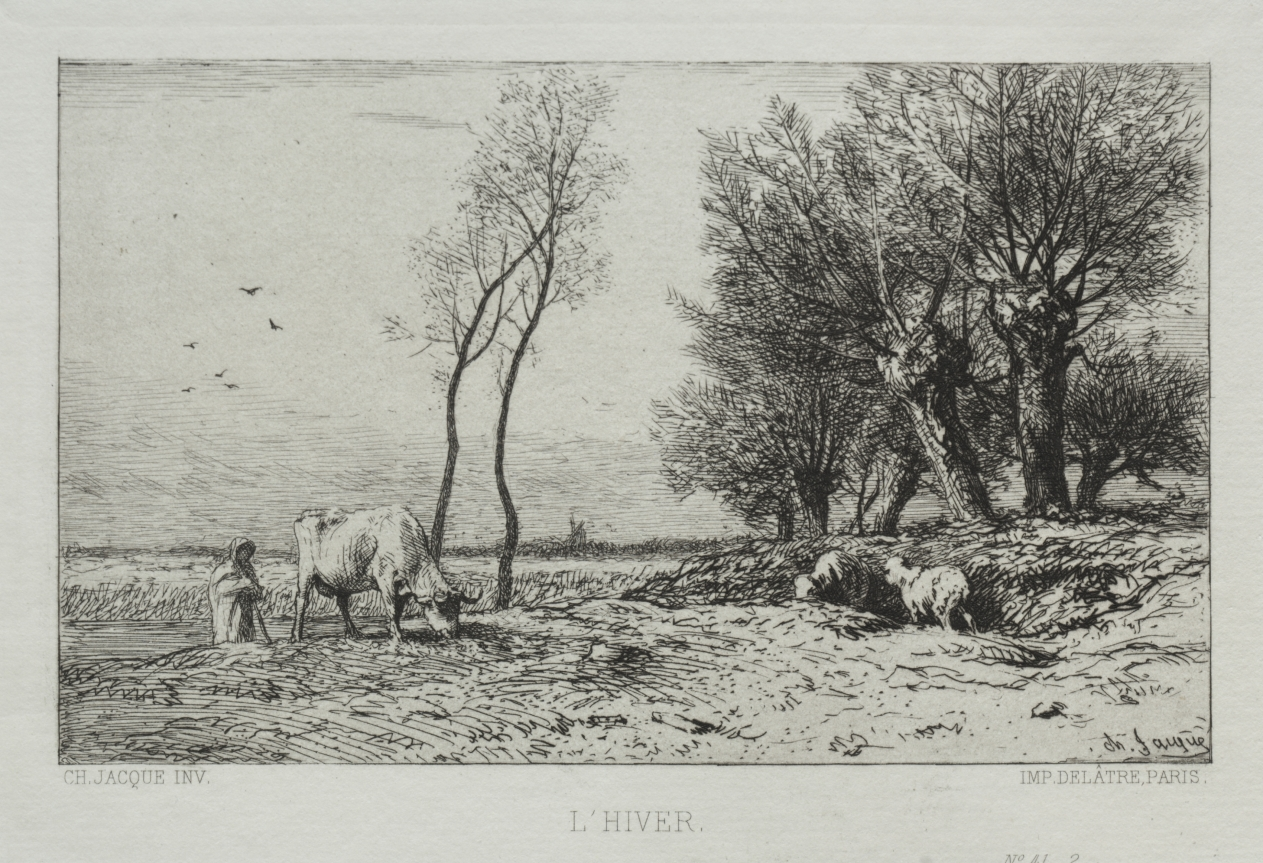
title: Winter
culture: France, 19th century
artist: Charles-Émile Jacque (French, 1813–1894)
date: 1867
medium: etching and drypoint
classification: Print